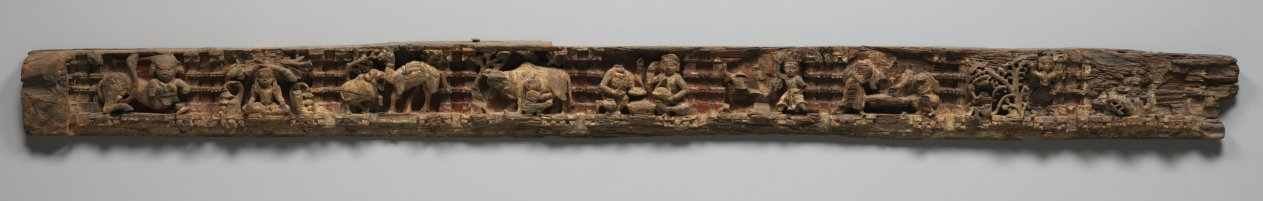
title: Narrative Frieze: Life of a Hermit in Forest Retreat Architrave from a Jain Temple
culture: India, Gujarat, 16th-17th century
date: 1500s-1600s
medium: wood with traces of color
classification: Sculpture